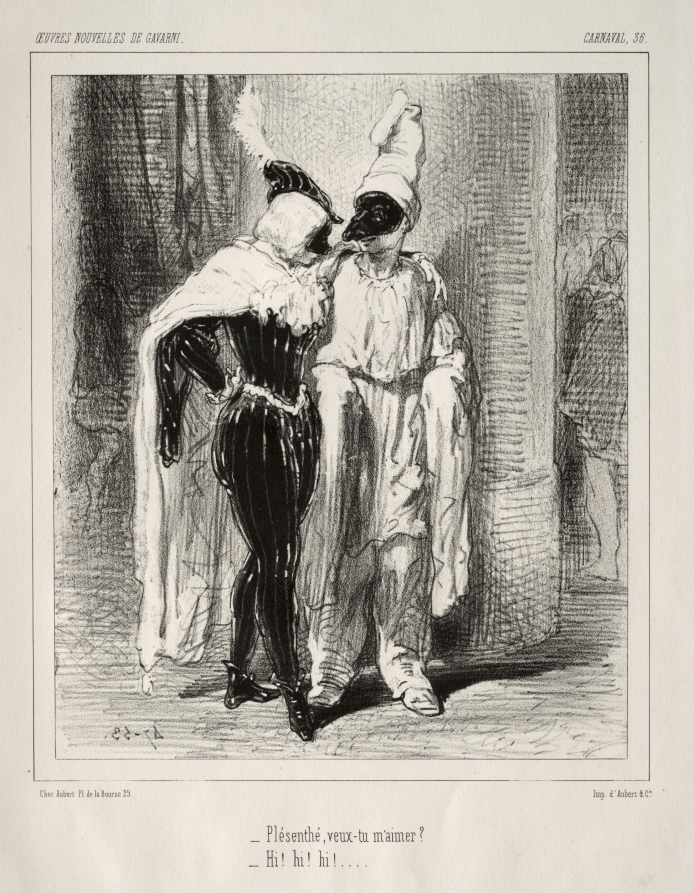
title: Carnaval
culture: France, 19th century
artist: Paul Gavarni (French, 1804–1866)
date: c. 1841–47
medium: lithograph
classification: Print